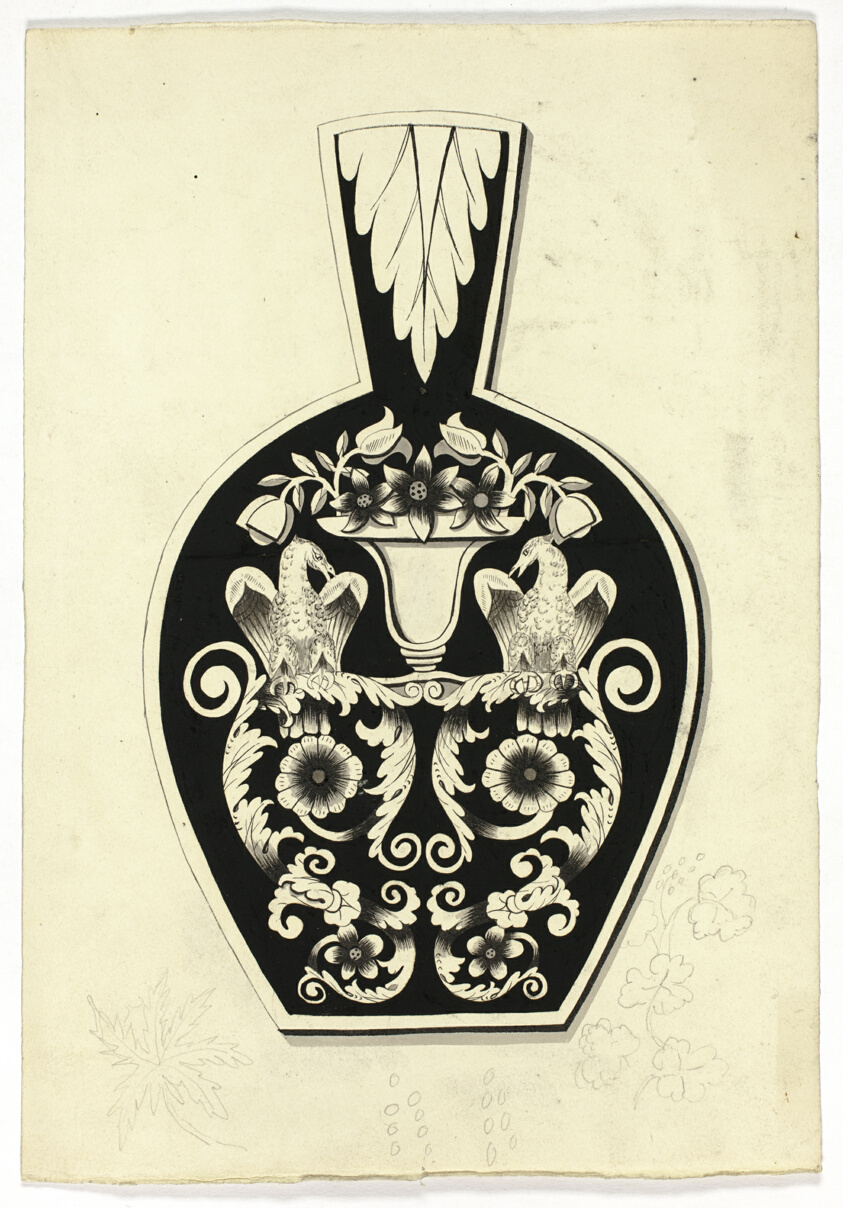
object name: Drawing and Watercolor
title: Decorative Design with Two Eagles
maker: Unknown Artist; German, 19th century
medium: Pen and brush, with black ink and gray wash and graphite, on ivory wove paper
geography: Germany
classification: pen and ink drawings; drawings (visual works); prints and drawing